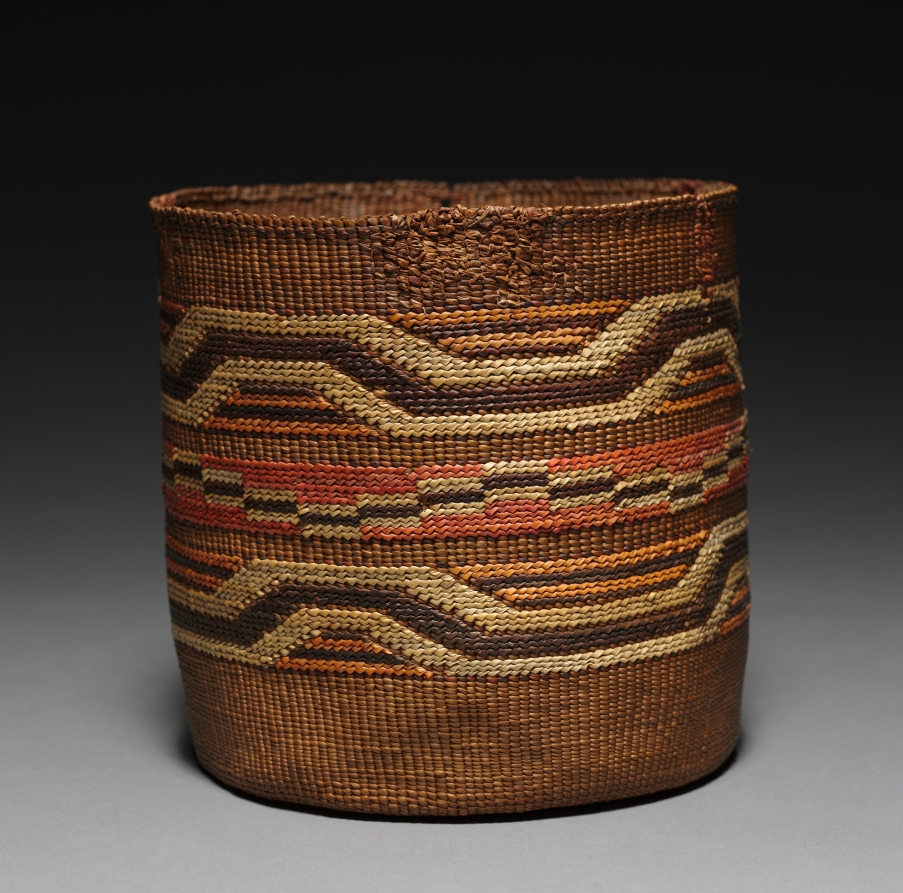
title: Bowl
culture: Northwest Coast, Tlingit, Unassigned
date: Unassigned, before 1917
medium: twined, imbricated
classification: Basketry